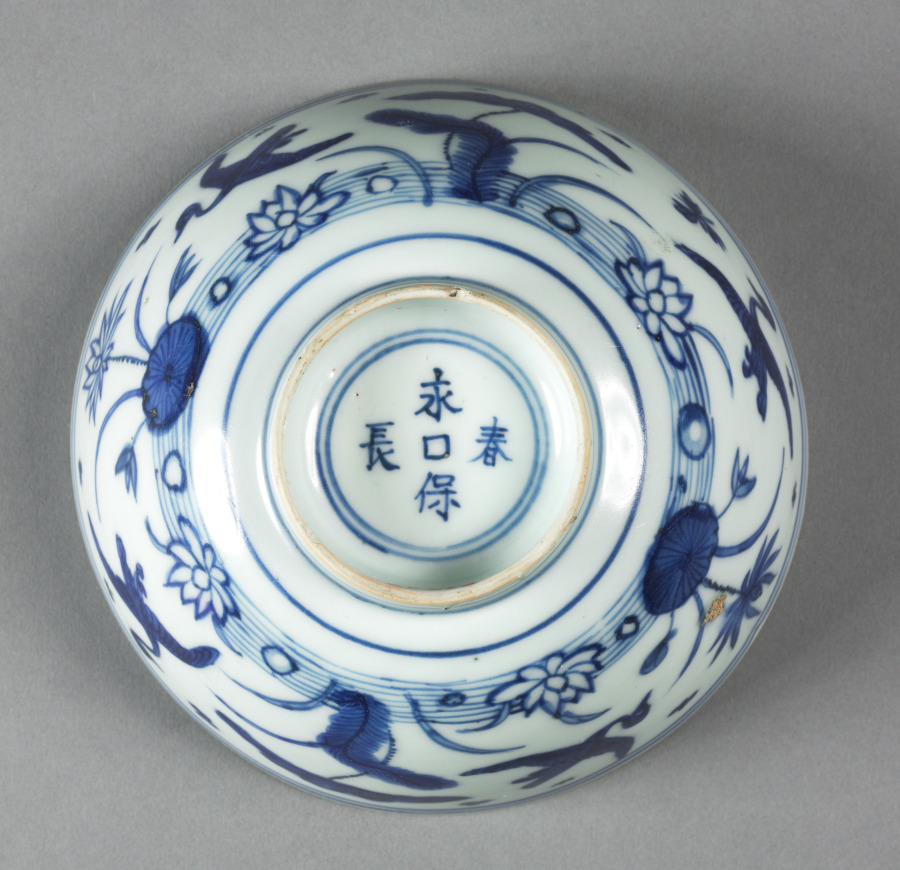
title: Bowl with Ducks over Lotus Pond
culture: China, Jiangxi province, Jingdezhen kilns, Ming dynasty (1368-1644), Wanli reign (1573-1620)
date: 1573–1620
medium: porcelain with underglaze blue decoration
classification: Ceramic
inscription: 永保長春